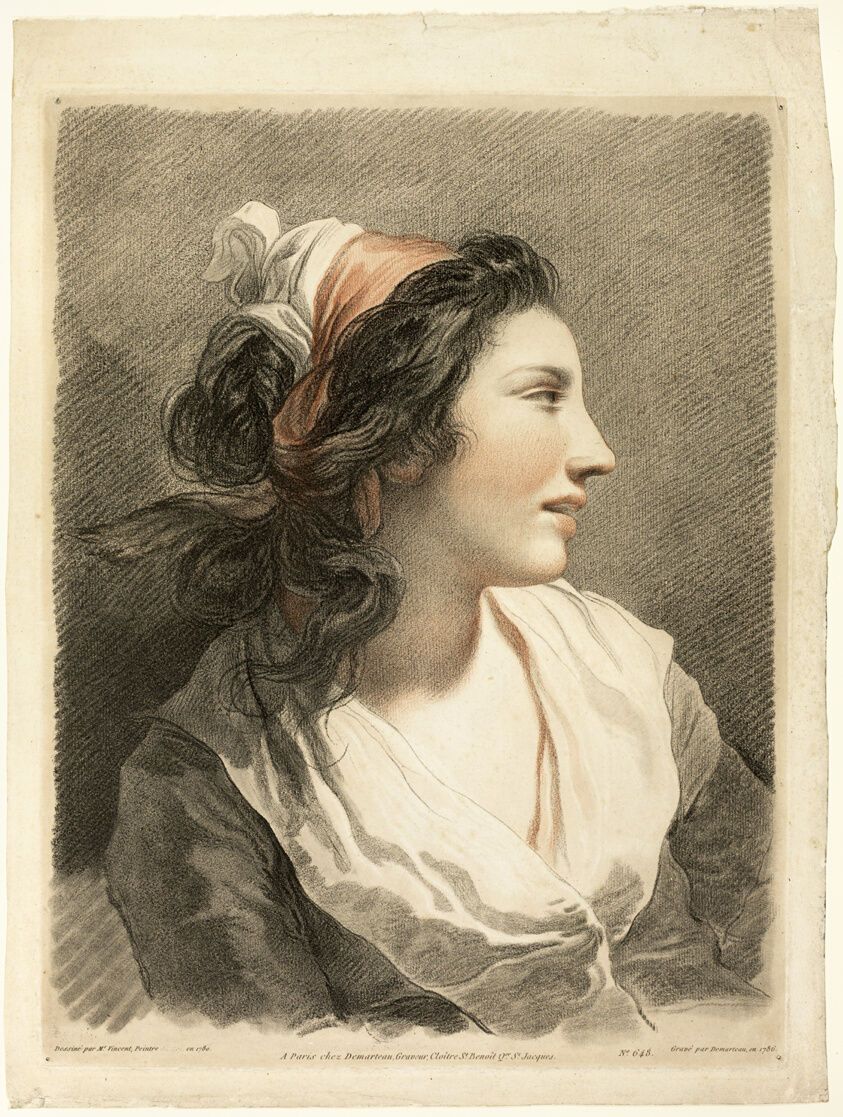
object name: Print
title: Large Female Head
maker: Gilles Antoine Demarteau, the Younger (Flemish, c. 1750-1806); after Francois André Vincent (French, 1746-1816)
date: c. 1788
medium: Crayon-manner etching and engraving in red and black ink from two plates on ivory laid paper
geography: Flanders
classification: etching; print; prints and drawing